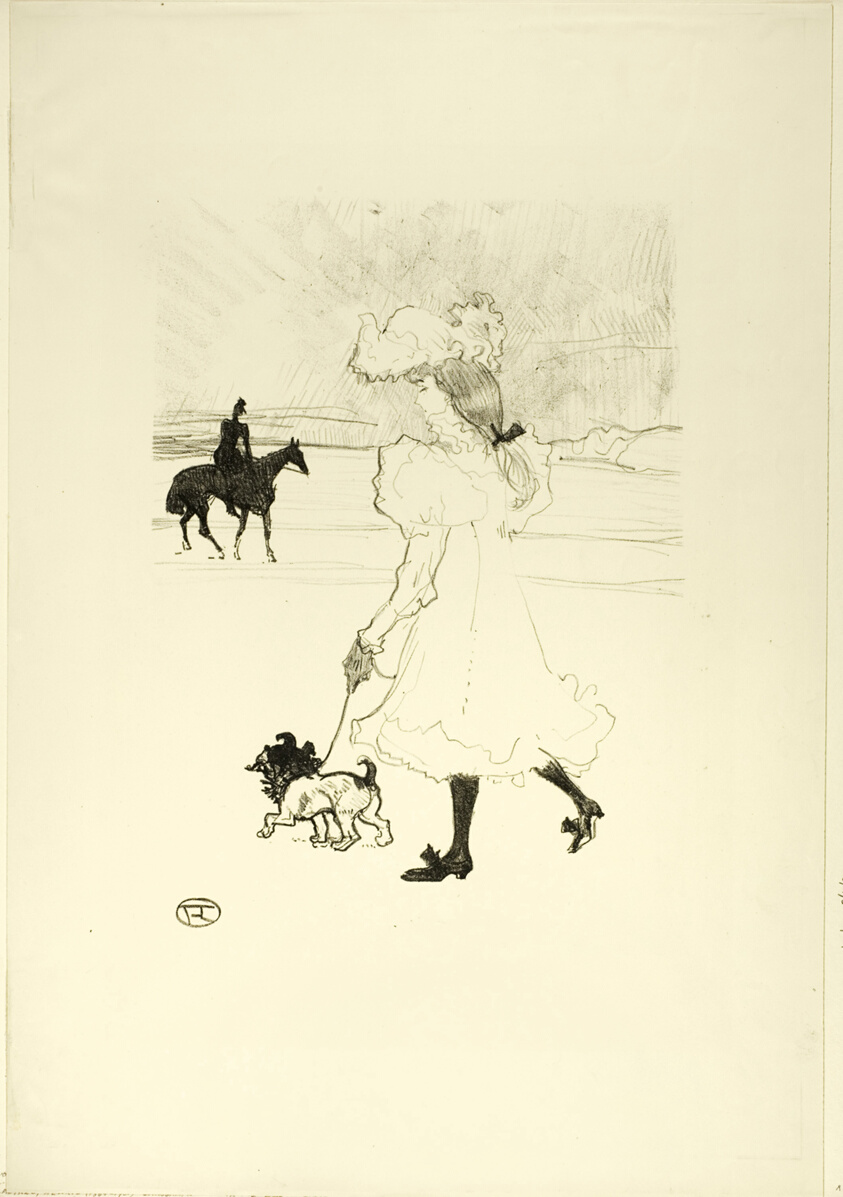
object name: Print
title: Au Bois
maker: Henri de Toulouse-Lautrec (French, 1864-1901)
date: 1899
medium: Lithograph on cream wove paper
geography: France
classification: lithograph; print; prints and drawing